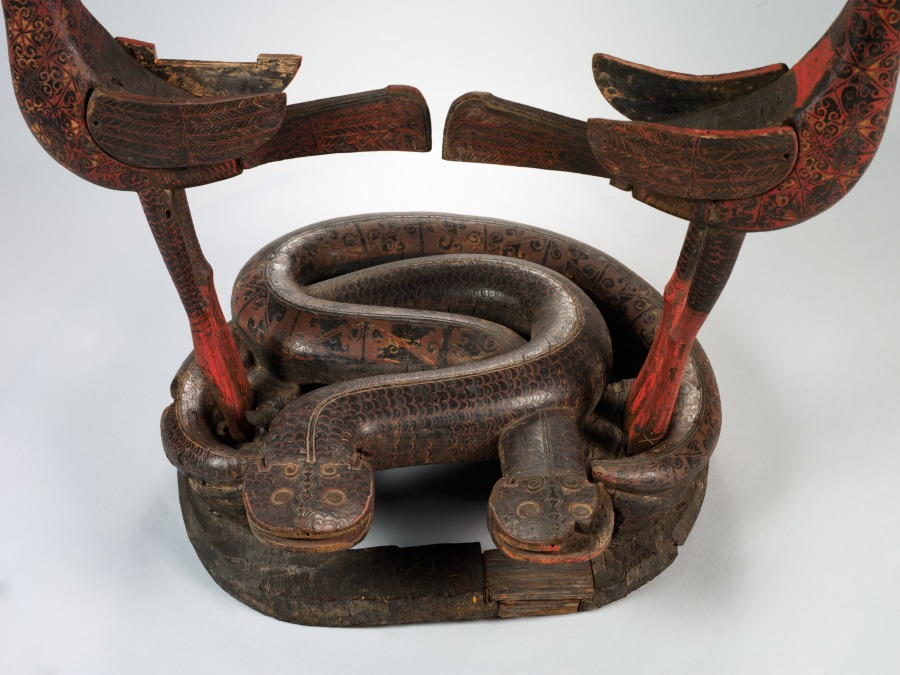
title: Cranes and Serpents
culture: China, reportedly from Hunan province, Changsha, Warring States period (475–221 BCE), State of Chu (c. 1046–223 BCE)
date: 475–221 BCE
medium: lacquered wood with polychromy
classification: Sculpture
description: A different style of ritual art developed in the state of Chu in South China. In addition to bronze vessels, lacquered wood artifacts expanded the repertory of ritual implements. This extraordinary sculpture was probably a drum stand for supporting a suspended drum in ritual ceremonies. It is unique among other excavated drum stands of the Chu, which typically show two birds standing on tigers. The theme of the bird stepping on the serpent was common in the Chu visual culture. Yet the slender proportions and seemingly flimsy structure of this particular set raise the question of whether it was utilitarian or mostly served symbolic functions in the tomb. The birds' and serpents' bodies have designs painted in red lacquer and yellow pigment against the black lacquer. Scientific analyses confirm the additional use of a blue or green pigment that has been discolored over time.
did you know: The cranes' long necks allowed a lightweight drum to be suspended from strings through the beaks, while the densely intertwined snakes provided a weighty base to stabilize the object during musical performances.